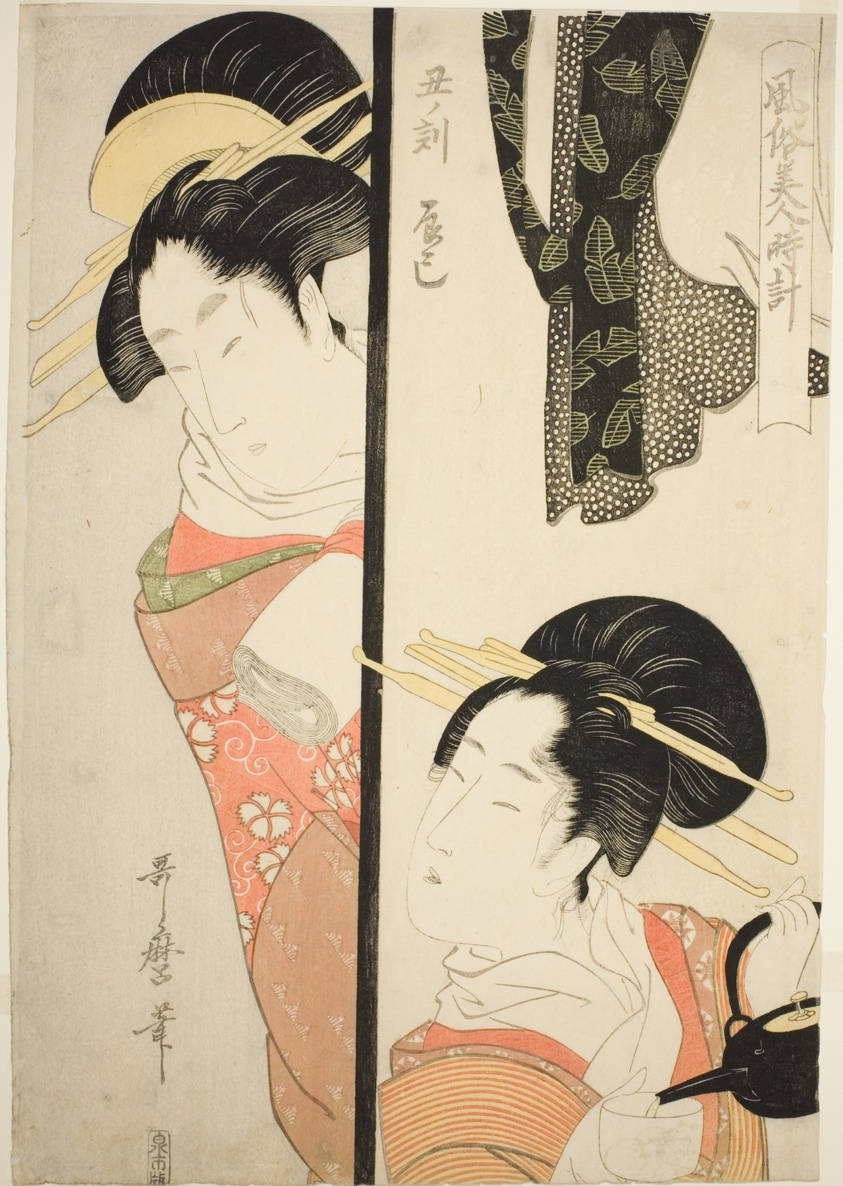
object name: Print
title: Hour of the Ox (Ushi no koku) Fukagawa Pleasure Quarter (Tatsumi), from the series "Customs of Beauties Around the Clock (Fuzoku bijin tokei)"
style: Japanese (culture or style)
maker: Kitagawa Utamaro 喜多川 歌麿; Japanese, 1753 (?)-1806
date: c. 1798/99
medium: Color woodblock print; oban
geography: Japan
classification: woodblock print; print; asian art